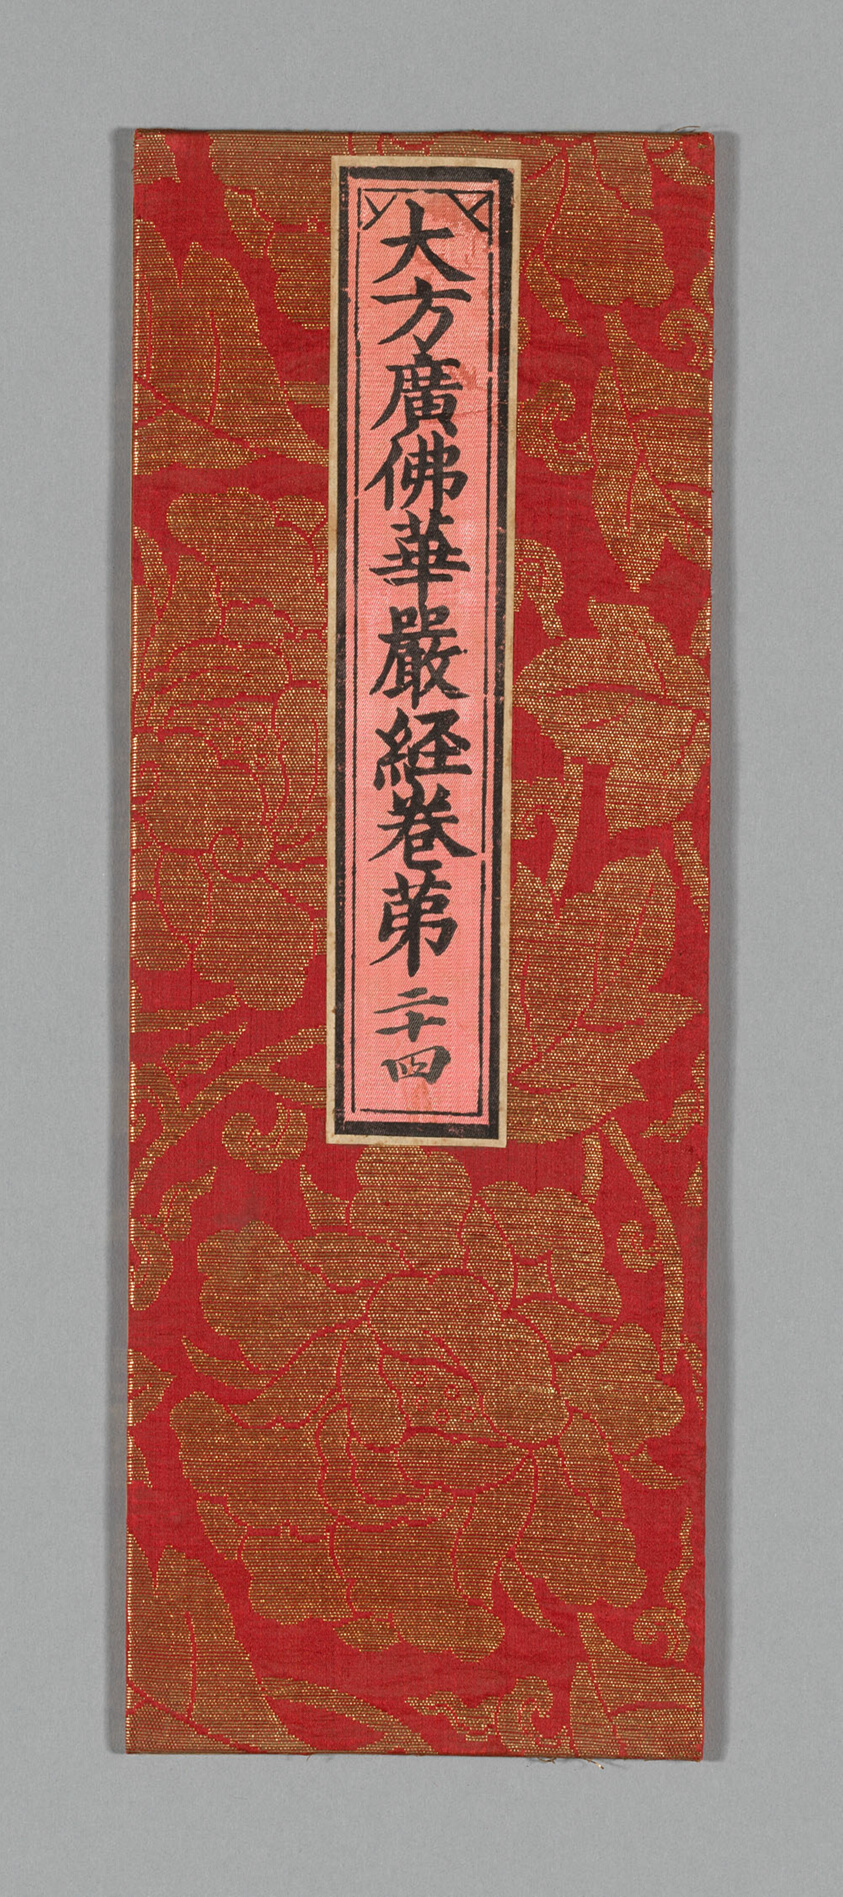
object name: Textile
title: Sutra Cover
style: ming, Chinese (culture or style), East Asian, asian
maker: China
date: Ming dynasty (1368–1644), c. 1590's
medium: Silk and gold-leaf-over-lacquered-paper strips, warp-float faced 4:1 satin weave with supplementary patterning wefts bound in weft-float faced 1:4 satin interlacings; label: silk, warp-float faced 3:1 'Z' twill weave; painted with ink; over paper;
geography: China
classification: textile; weaving